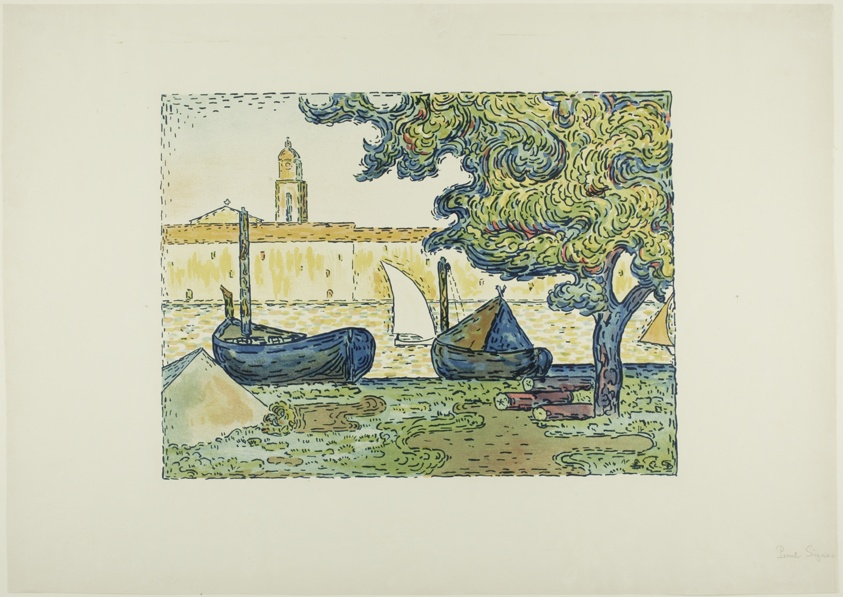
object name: Print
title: The Port of St. Tropez II, from the seventh album of L'Estampe originale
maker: Paul Signac (French, 1863-1935)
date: 1894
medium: Lithograph in yellow, dark blue, light blue, green, red and peach on ivory wove paper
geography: France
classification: lithograph; print; prints and drawing